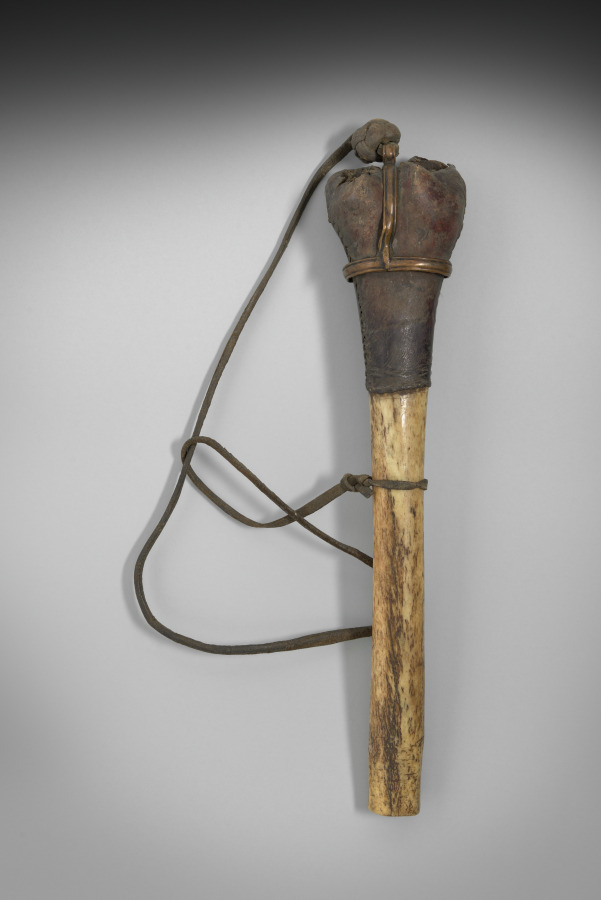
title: Thighbone Trumpet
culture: Tibet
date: c. 1800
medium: bone, leather, and copper alloy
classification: Musical Instrument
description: Blown during tantric Buddhist rituals, this ritual instrument is made of bone to remind practitioners of the impermanence of the corporeal body. The horn is sounded to clear away obstacles to enlightenment, conceived as enemies in battle.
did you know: Tantric ritual trumpets are traditionally made from human femurs, but now they can be made from plastic, metal, or other materials.